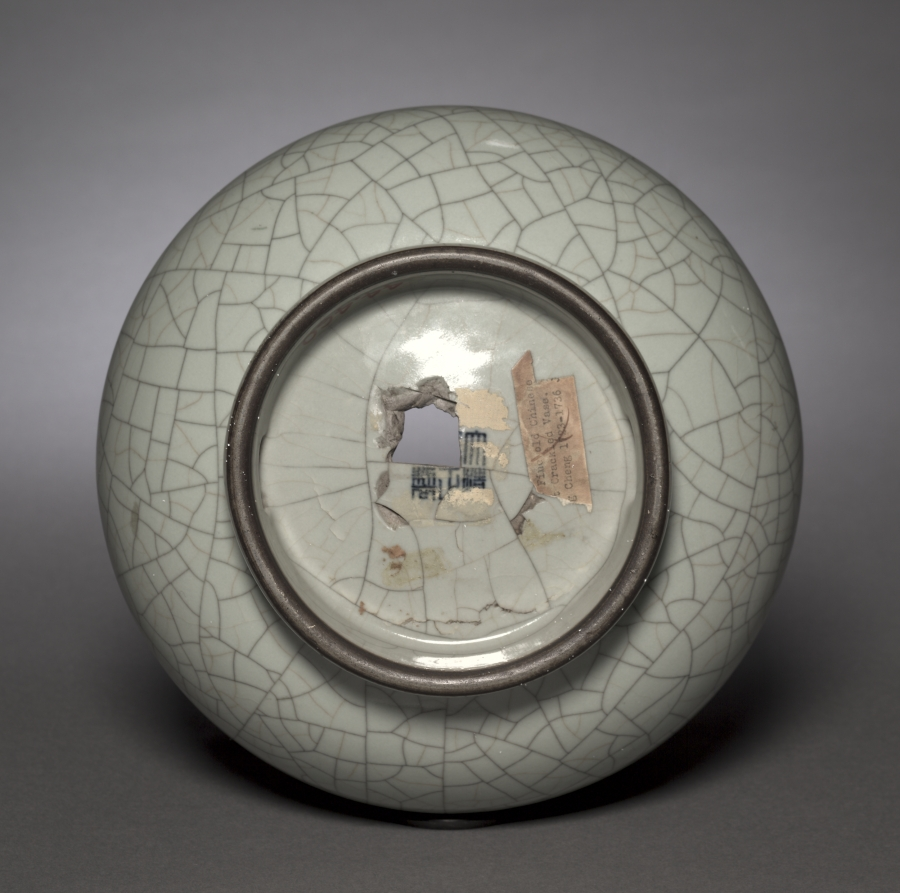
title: Vase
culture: China, Jiangxi province, Jingdezhen kilns, Qing dynasty (1644-1911), Yongzheng mark and reign (1723-35)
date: 1723–35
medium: porcelain with a crackled Guan-type glaze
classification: Ceramic